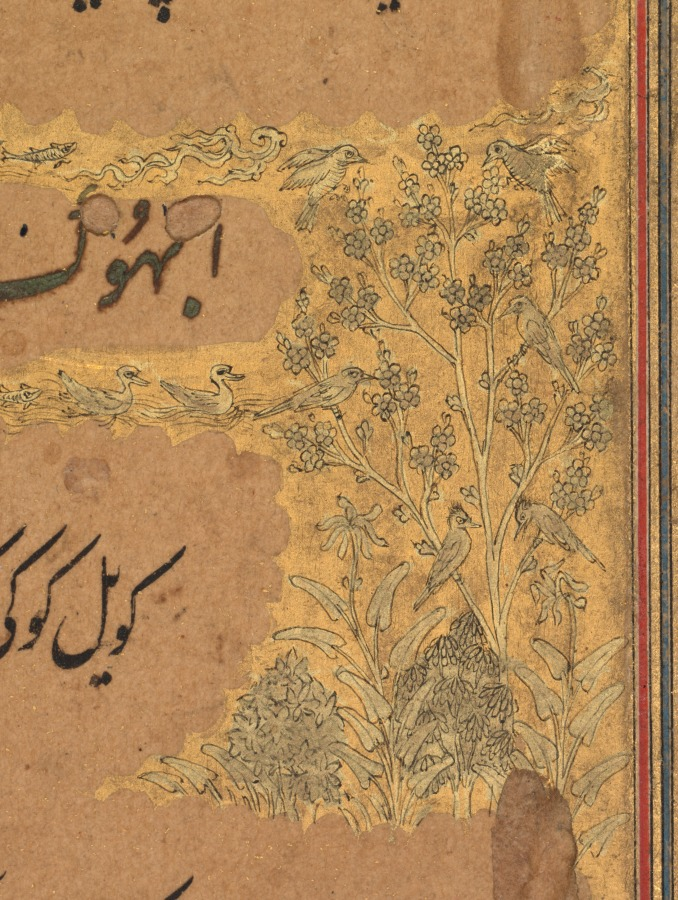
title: From Dohras (Songs) 40 and 36 from the Kitab-i Nauras of Sultan Ibrahim Adil Shah II (verso)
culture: India, Bijapur, Deccan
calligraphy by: Khalilullah Butshikan (Persian, active in India 1596–c. 1620)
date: 1618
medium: ink with two-tone gold on paper, double-sided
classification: Painting